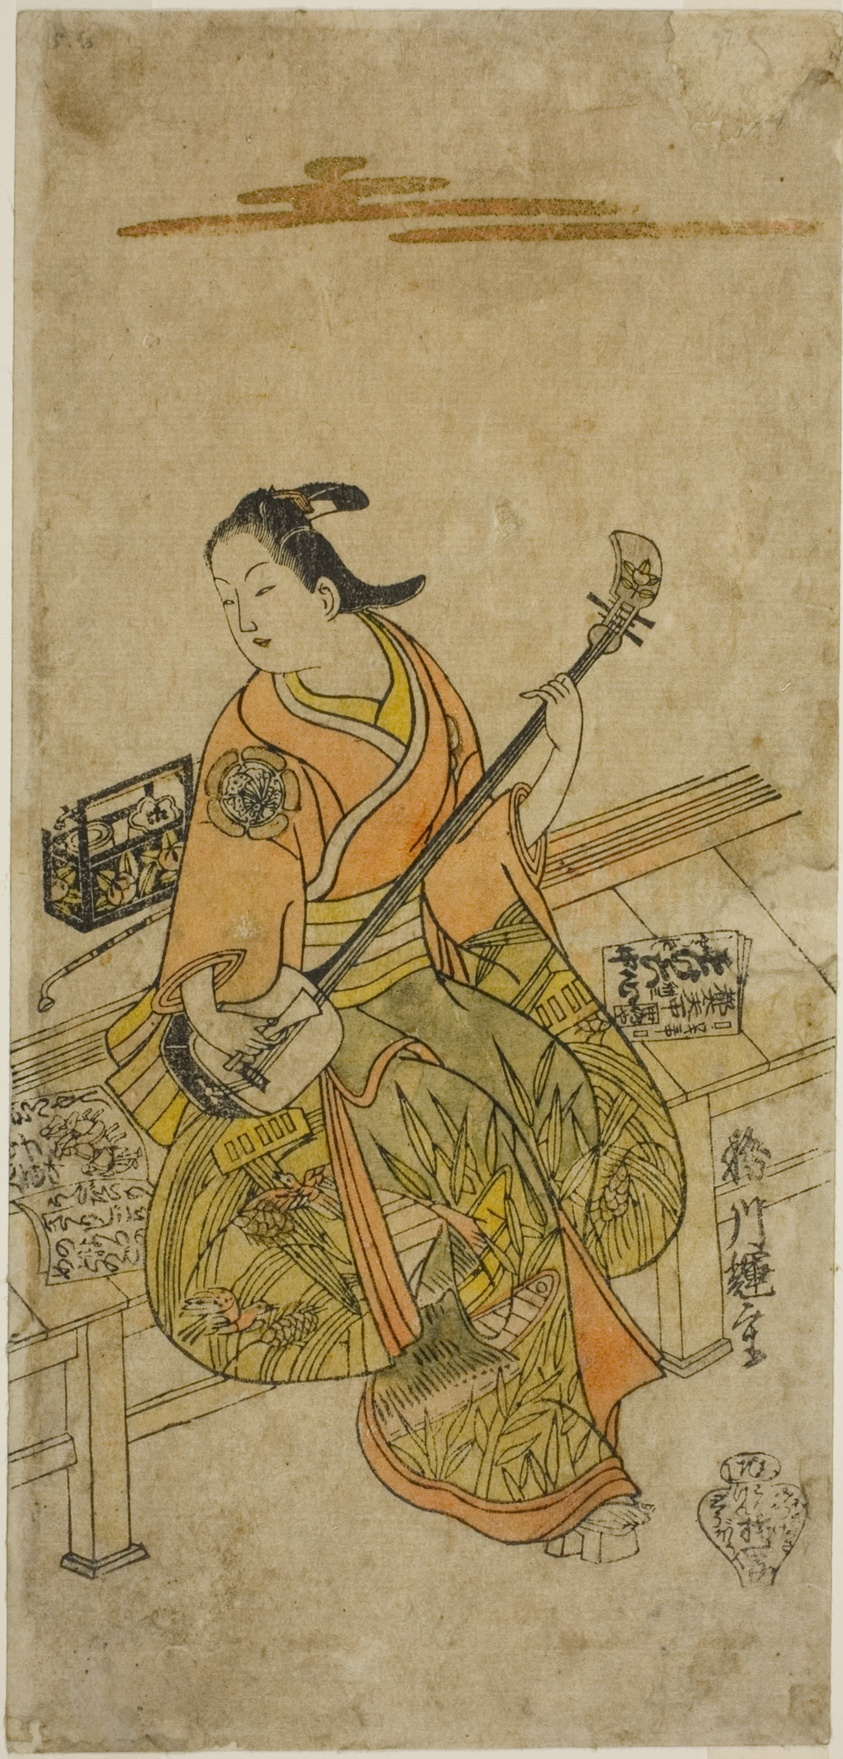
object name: Print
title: The Actor Yamashita Kosasaburo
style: Japanese (culture or style)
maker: Katsukawa Terushige (Japanese, active c. 1716-36)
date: c. 1720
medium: Hand-colored woodblock print; hosoban, urushi-e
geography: Japan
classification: woodblock print; print; asian art